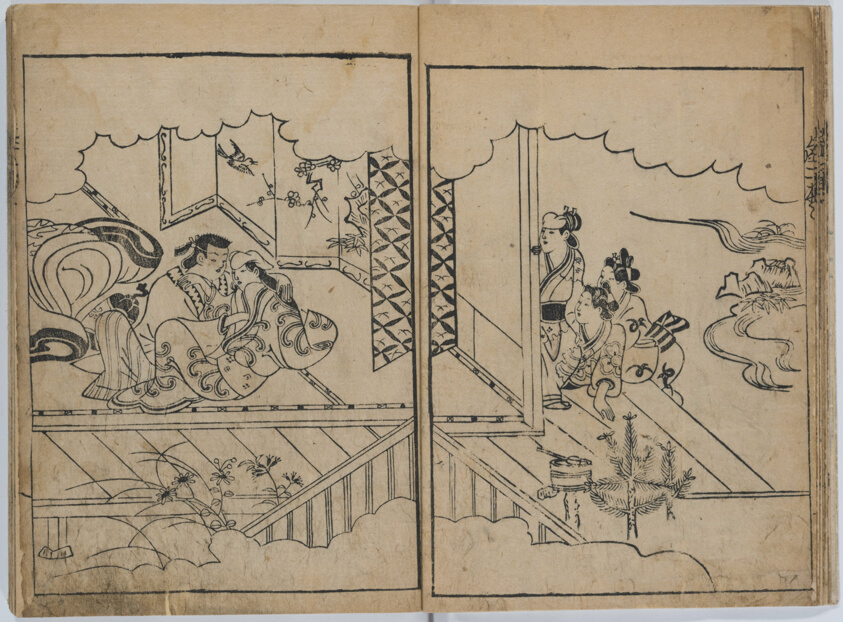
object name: Book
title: The love story of O-yuri and Ohara Iori (no title)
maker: Torii Kiyomasu I (Japanese, active c. 1704–18 (?))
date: 1696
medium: Woodblock-printed book, sumizuri-e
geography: Japan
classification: book